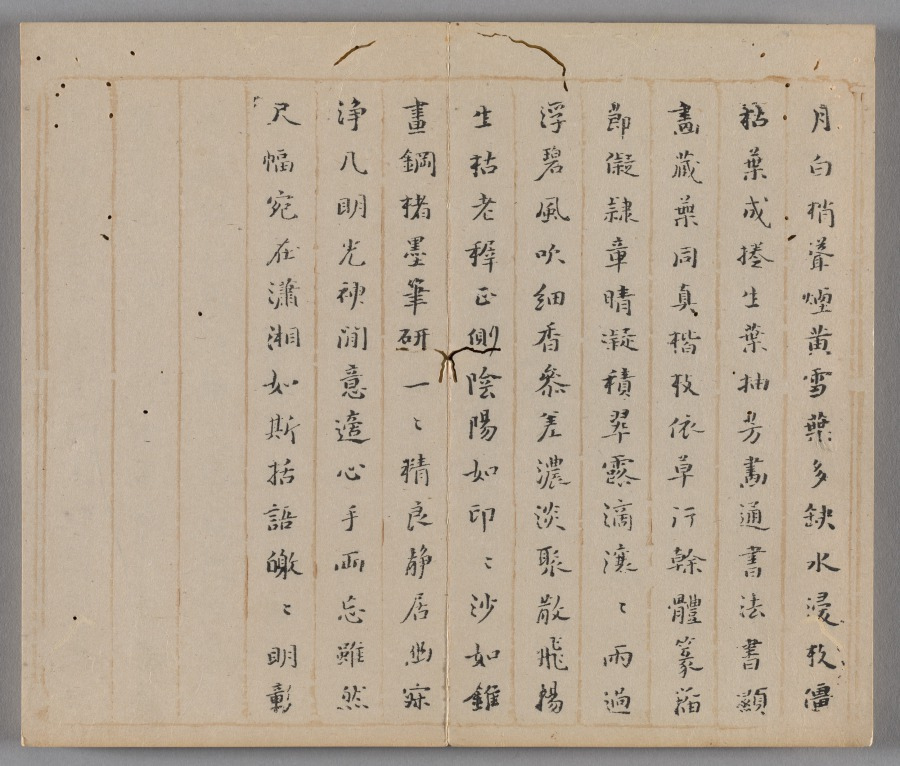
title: Ten Bamboo Studio Painting and Calligraphy Handbook (Shizhuzhai shuhua pu): Bamboo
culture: China, Qing dynasty (1644-1911)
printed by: Hu Zhengyan (Chinese, c. 1584–1674)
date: 1633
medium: Woodblock-printed book; ink and colors on paper; first edition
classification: Print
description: Color printing reached a level of perfection in the early 1600s, as seen in this Ten Bamboo Studio Collection of Calligraphy and Painting and the Mustard Seed Garden Manual of Painting (printed 1679 and 1701). The painterly quality, precision in registering (aligning) the woodblocks, and harmonious colors made them the most successful color print editions in Chinese history. Both editions were printed and compiled in Nanjing, spread nationwide, and had a great impact on the arts in Japan and Korea.